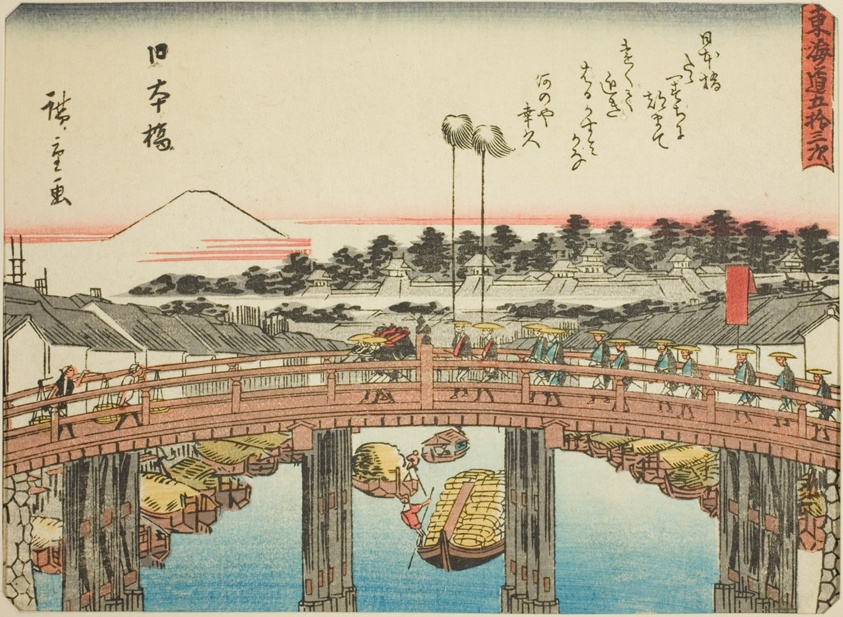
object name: Print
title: Nihonbashi, from the series "Fifty-three Stations of the Tokaido (Tokaido gojusan tsugi)," also known as the Tokaido with Poem (Kyoka iri Tokaido)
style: Japanese (culture or style)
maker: Utagawa Hiroshige 歌川 広重; Japanese, 1797-1858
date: c. 1837/42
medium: Color woodblock print; chuban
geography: Japan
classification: woodblock print; print; asian art